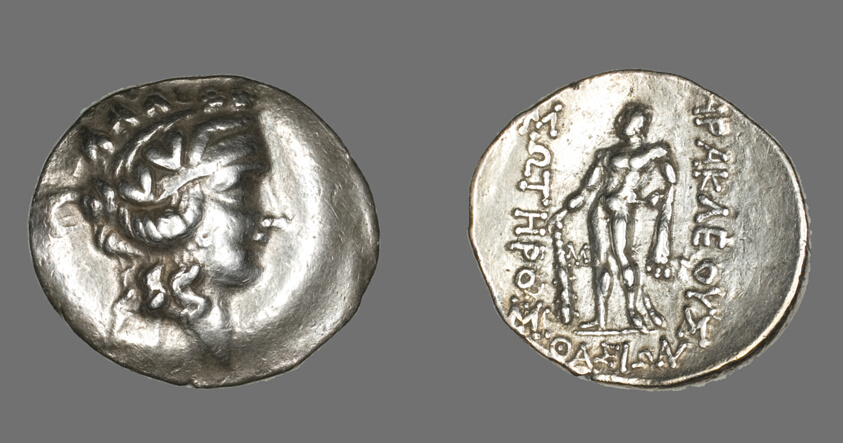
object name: Coin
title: Tetradrachm (Coin) Depicting the God Dionysos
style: greek, ancient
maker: Greek; minted in Thasos, Thrace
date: after 146 BCE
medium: Silver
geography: Thásos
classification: coin; ancient art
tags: mythological figures, gods (deities), Heracles